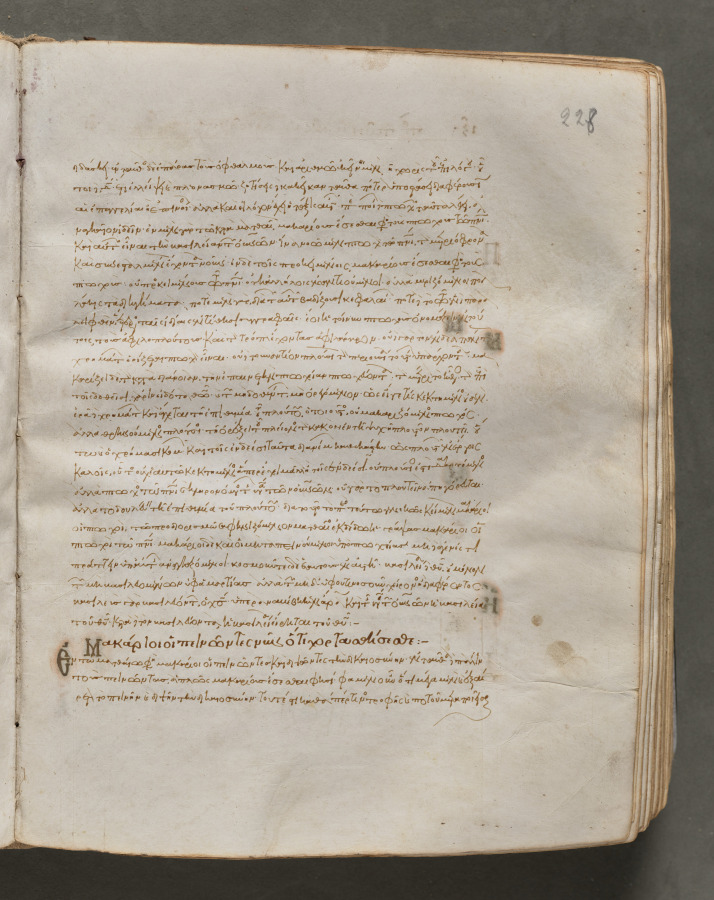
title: Text, folio 228 (recto), from a Gospel Book with Commentaries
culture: Byzantium, Constantinople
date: c. 1000–1100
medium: ink, tempera, and gold on vellum; leather binding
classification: Bound Volume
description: Each of the four gospels in this book opens on a page with brilliantly illuminated borders depicting the author of the text as well as birds-principally peacocks, symbols of the immortality of the soul-and fountains, representing the fountain of life and the salvation of the soul. This volume consists of 428 leaves with texts in Greek. Its level of sophistication suggests that it was probably written and decorated in a monastery in Constantinople.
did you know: Gospel Books were carried in procession through Byzantine churches.